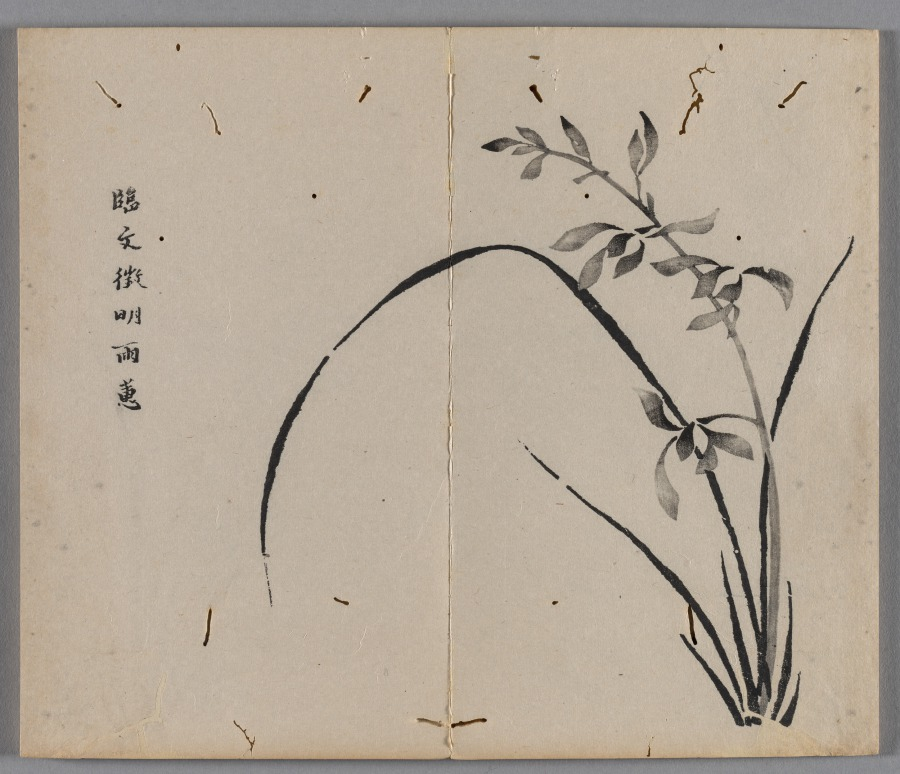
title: Ten Bamboo Studio Painting and Calligraphy Handbook (Shizhuzhai shuhua pu): Orchids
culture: China, Qing dynasty (1644-1911)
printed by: Hu Zhengyan (Chinese, c. 1584–1674)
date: 1633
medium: Woodblock-printed book; ink and colors on paper; first edition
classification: Print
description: Color printing reached a level of perfection in the early 1600s, as seen in this Ten Bamboo Studio Collection of Calligraphy and Painting and the Mustard Seed Garden Manual of Painting (printed 1679 and 1701). The painterly quality, precision in registering (aligning) the woodblocks, and harmonious colors made them the most successful color print editions in Chinese history. Both editions were printed and compiled in Nanjing, spread nationwide, and had a great impact on the arts in Japan and Korea.